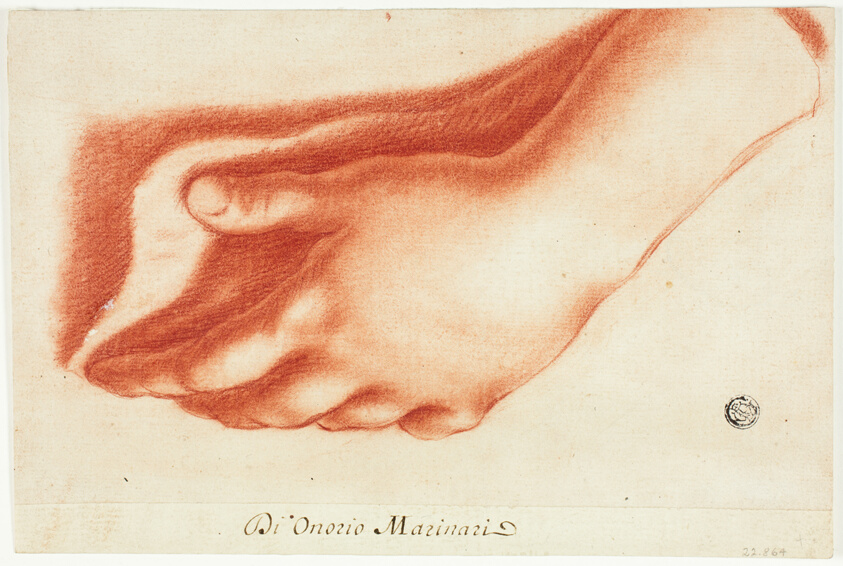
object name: Drawing and Watercolor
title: Plaster Cast of Left Hand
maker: Onorio Marinari (Italian, 1627-1715)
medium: Red chalk with stumping on ivory laid paper, laid down on ivory laid paper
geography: Italy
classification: chalk; drawings (visual works); prints and drawing